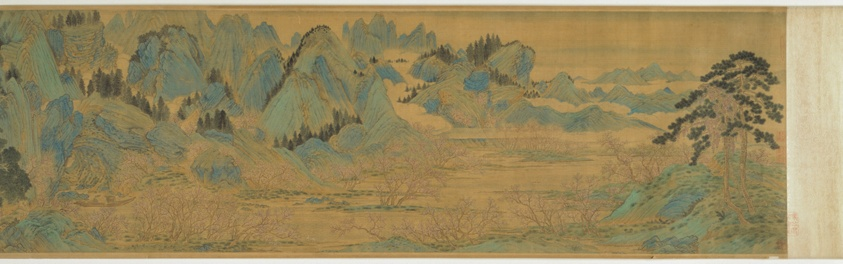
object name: Painting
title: The Peach Blossom Spring 桃花源圖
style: Chinese (culture or style)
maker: Artist unknown (17th century), spurious signature of Qiu Ying 仇英 (c. 1500-1552); Chinese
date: Late Ming (1368–1644) or early Qing (1644–1912) dynasty 明朝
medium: Handscroll; ink and color on silk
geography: China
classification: handscroll; painting; asian art